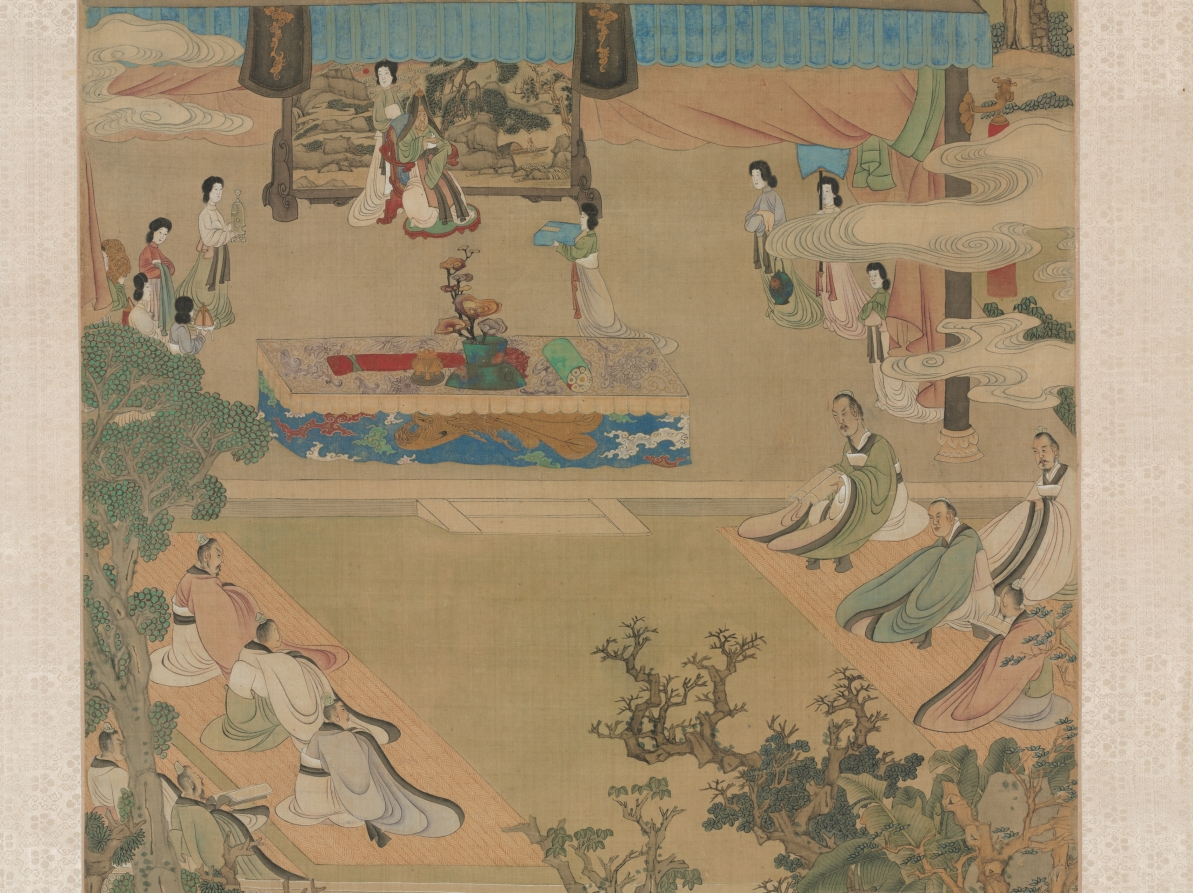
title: Lady Xuanwen Giving Instruction on the Rites of Zhou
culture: China, Ming dynasty (1368–1644)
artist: Chen Hongshou (Chinese, 1598/99–1652)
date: 1638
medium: Hanging scroll; ink and color on silk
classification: Painting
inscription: 宣文君者韋逞母宋氏也。父授以周官音義，曰：吾家世學傳周官。傳業相繼。此又周公所製，經紀〔典〕誥百官品物備於此矣。女可受之。君諷誦不輟。石帝徙山東。君乃推鹿車，背負父所授書到冀州。逞時年少。晝則採樵，夜則教逞。逞遂學成名立。仕符堅為太常。堅常幸其太學，問博士經典。乃憫禮樂遺缺。時博士盧壺對曰：廢學既久，書傳零落。比年綴撰，正經粗集。惟周官、禮經，未有其師。竊見太常韋逞母宋氏世學家，女傳其父業。得周官音義。今年八十。視聽無闕。非此母無可傳授後生。于是就宋氏家立講堂，置生員百二十人。隔絳紗縵而授業焉。拜宋氏爵，號為宣文君。賜侍婢十人。周官學後行于世。 崇禎戊寅八月二日，為綬姑六旬之辰。綬弟自成為姑偦。偕姑季女駱密、外孫楹、楠、楩、橒、楞、棅、孫女惠、漉酒上壽，屬綬圖寫，所以頌祝者。綬思宋母尚五胡之時，經藉屬之婦人；今太平有象，而秉杖名義者，獨綬姑爾。敬寫此圖，且厚望于弟紹焉。猶子洪綬九頓首。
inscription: 5 additional seals: 2 of Xu Weiren 徐渭仁(1788－1855); 2 of Sun Zutong 孫祖同 (1894–1937); 1 of C. C. Wang 王季遷 (1907–2003).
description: This painting by Chen Hongshou depicts the story of Xuanwen Jun, or Lady of Literary Propagation, at a venerable age, instructing young scholars on the Confucian classics. It was painted for Chen’s aunt in celebration of her 60th birthday. Chen’s painting style is archaic in the use of fine outlines and brilliant coloring with mineral pigments. In depicting the figures, he uses the “iron-wire” brush style (fine, even lines) with deliberate control. The faces are elongated and exaggerated. A few ritual bronzes lend the scene an antique flavor.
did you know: Chen Hongshou's long inscription at the top of the painting compares his virtuous aunt with the historical exemplar, Lady Xuanwen.